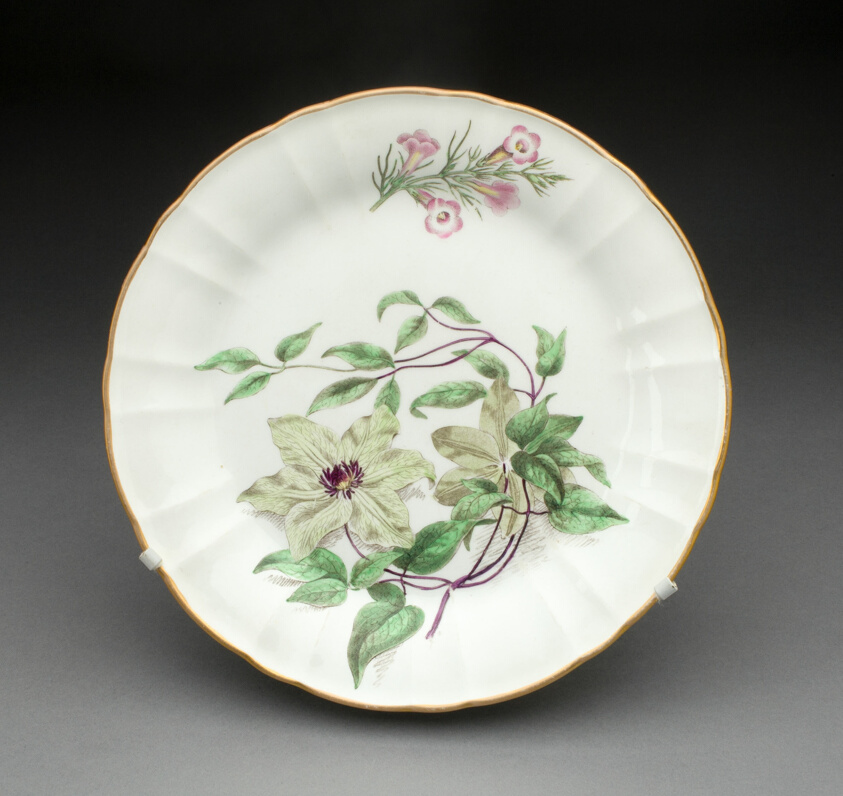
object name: Ceramics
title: Plate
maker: Wedgwood Manufactory (England, founded 1759)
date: c. 1820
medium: Porcelain with transfer-printed polychrome enamels and gilding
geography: Burslem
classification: plate (general, dish); tableware; dish (vessel); porcelain; european decorative arts; ceramics